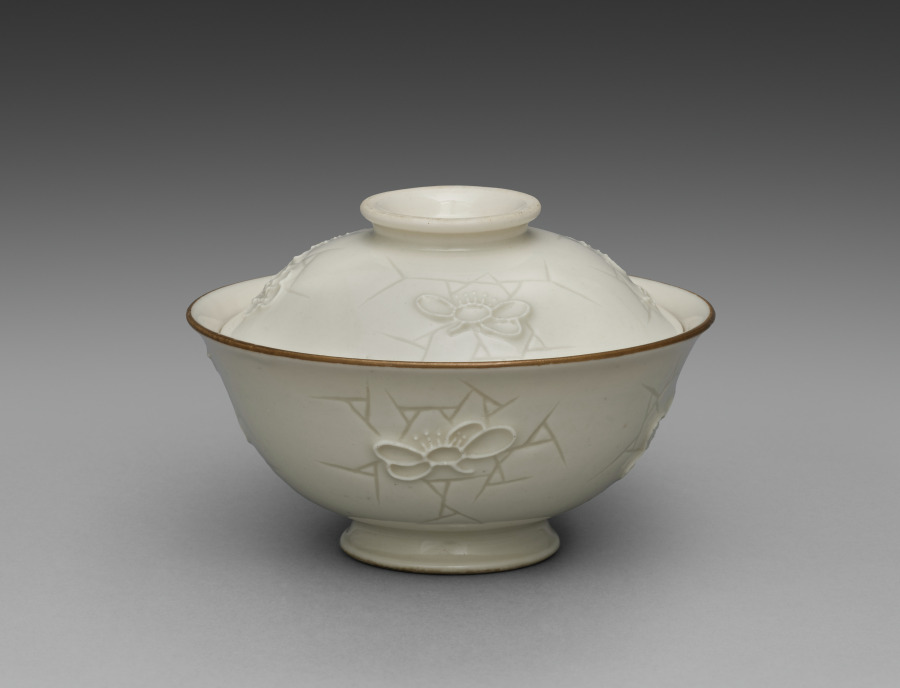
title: Covered Bowl from Dining Set with Plum Blossoms and Cracked-Ice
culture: Japan, Meiji period (1868–1912)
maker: Seifū Yohei II (Japanese, 1844–1878)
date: c. 1875–78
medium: Porcelain with molded designs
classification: Ceramic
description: Each item in this set has a delicate low-relief design of flowering plum branches over scattered, intersecting lines meant to resemble the cracked-ice surface of a frozen body of water and is signed on the base in gold pigment. While Yohei II produced many fine works in underglaze blue, like those produced by Kiyomizu Shichibei, he also made works in quite different styles later in his career, from the early 1870 s. In 1873, he was appointed purveyor to the Industrial Center of Kyoto Prefecture, a designation associated with Kyoto’s efforts to reach an international market through the port of Kobe; and from 1875 until his death, he was involved in national-level projects to present Japanese ceramics across the world. It was during this period that Yohei III was apprenticed to Yohei II, and it has been suggested that this set may in fact be an early example of Yohei III’s work, which he signed with his teacher’s name. Decorated with flowers resembling Japanese textile motifs, the set calls to mind the design of Yohei II’s pair of vases with plum blossoms in the Victoria and Albert Museum. Here, the elaborate trees created for a formal public exhibition setting have been translated into the approachable blossoms of the genteel domestic environment. While the designs are consistent across the pieces, each raised flower petal and pistil and each incised line in the ice was done by hand, so the cups, bowls, and dishes are similar yet unique. The bottoms of two boxes once identified the set’s owner, but the information has been deliberately obscured with black ink. However, inscriptions still visible appear to indicate two occasions, once at the end of July 1886 , and once again in June 1916 , when parts of the set were requested from Hokura in Niigata Prefecture. The location corresponds to a neighborhood in the present-day city of Jōetsu. The surname Tsuji 辻 also appears on a paper tag affixed to one of the box cloths. Future research may possibly reveal more about their provenance. A vase by Yohei III in a private collection combines the formal grandeur of the Yohei II vases in the Victoria and Albert Museum with the gentler design of this dining set, placing flowering plum trees against soft, scalloped-edge clouds resembling those in golden screens.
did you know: The dining wares have a creamy white coloration that the four boxes containing them identify as Korean in style.